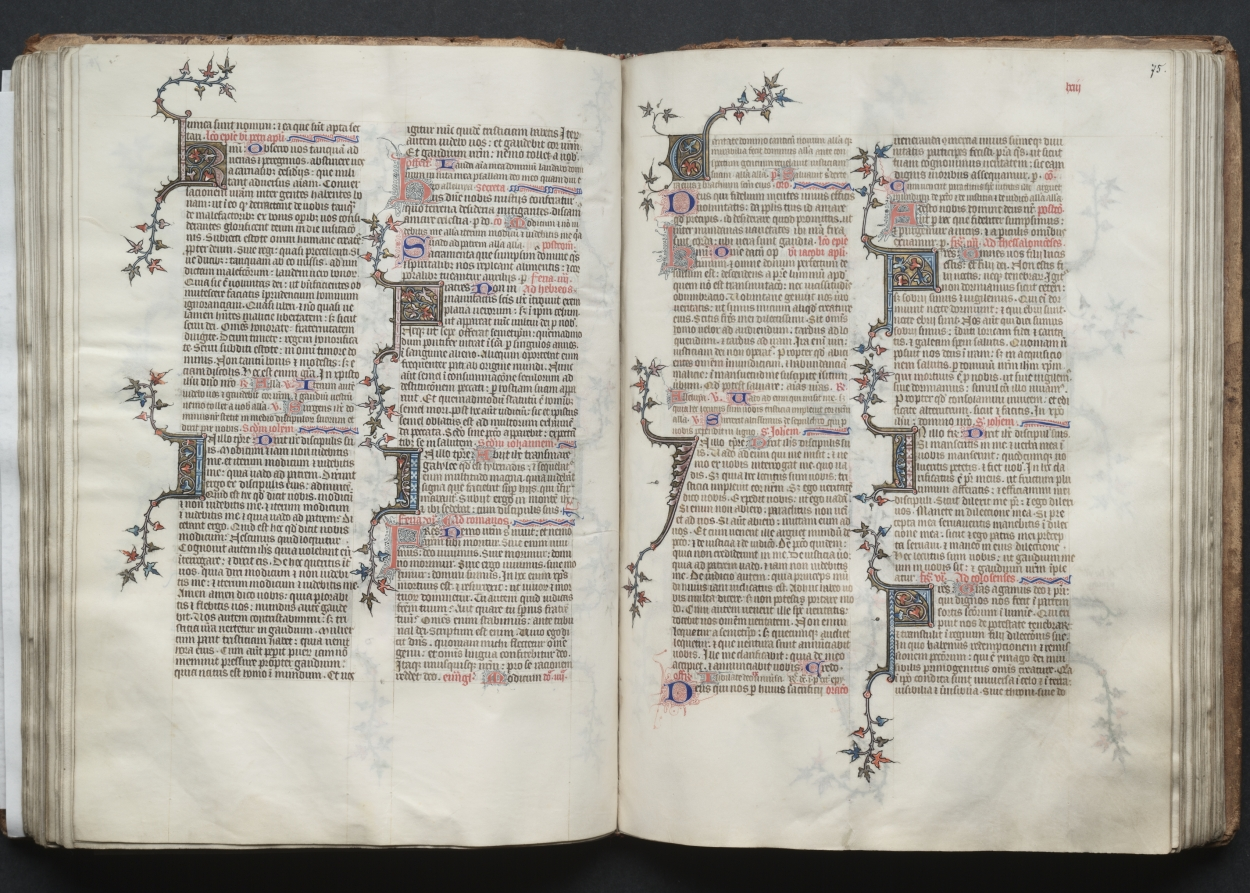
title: The Gotha Missal: Fol. 74v, Text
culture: France, Paris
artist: Master of the Boqueteaux (French)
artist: and Workshop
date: c. 1375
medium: ink, tempera, and gold on vellum; blind-tooled leather binding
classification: Bound Volume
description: The style and quality of this manuscript's decoration is typical of deluxe Parisian books made for aristocratic or royal patrons. Most of the book's decoration appears to be the work of the Master of the Boqueteaux, an artist active at the court of King Charles V (died 1380). His style was apparently shared by a number of book illuminators working in and around Paris. It is very possible that the Gotha Missal belonged to Charles V, but is not provable because the manuscript has no royal portraits and lacks a colophon. Given the book's magnificent decoration, however, it would seem that it was produced for a Valois prince, if not for the king himself. The manuscript receives its name from the German dukes of Gotha, its later owners.